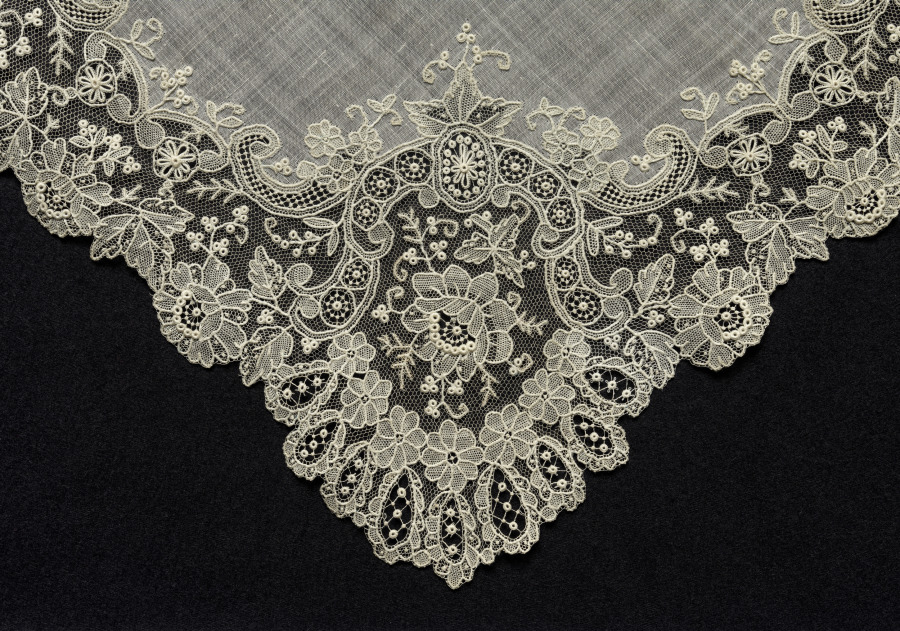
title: Lace Handkerchief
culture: Belgium, Brussels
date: 1860–99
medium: Plain weave linen center; linen needle lace (point de gaze) border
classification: Lace